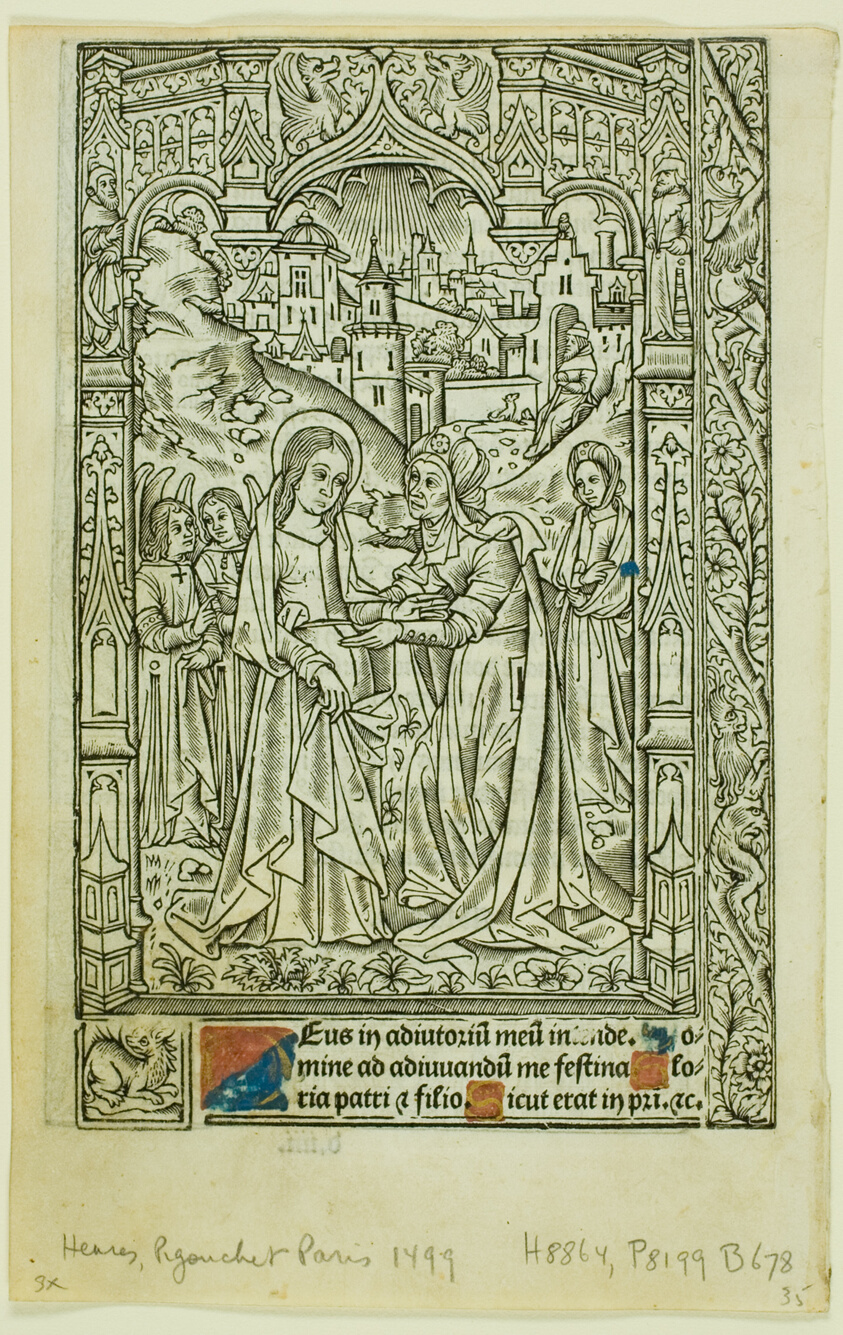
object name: Print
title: Visitation, from Book of Hours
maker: Philippe Pigouchet (French, active 1488-1518); published by Simon Vostre (French, active 1486–1518)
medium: Woodcut, with hand-coloring, in black on paper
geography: France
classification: woodcut; print; prints and drawing